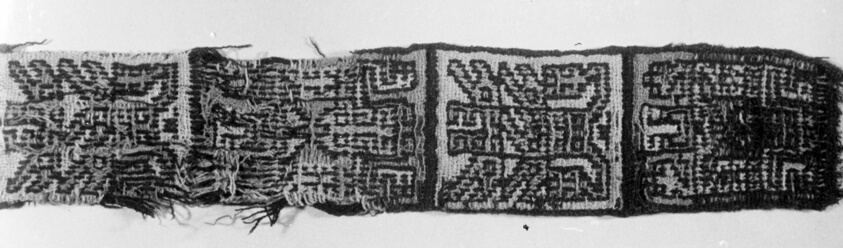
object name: Textile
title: Band or Belt Fragment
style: nazca, andean, andes, Pre-Columbian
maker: Nazca-Wari; Probably south coast, Peru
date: A.D. 700/900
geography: Peru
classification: textile; weaving